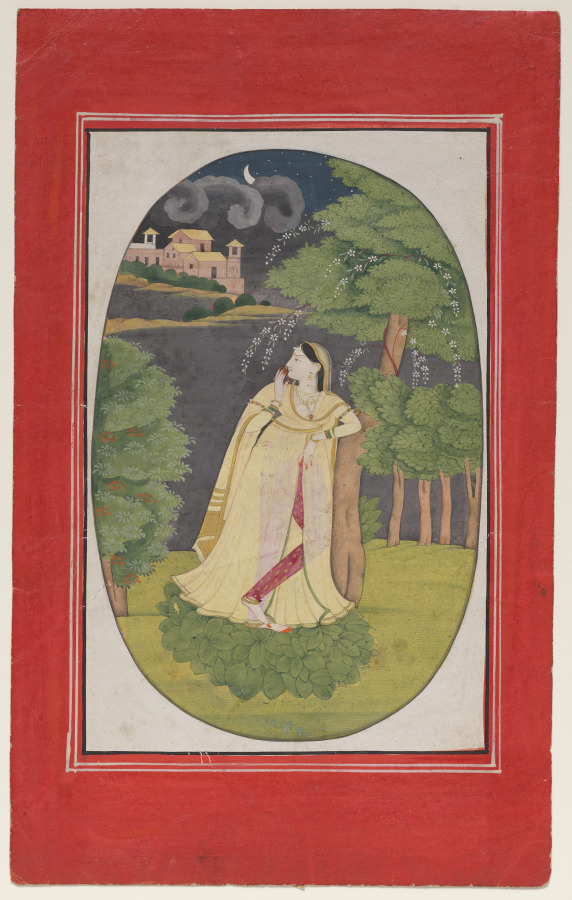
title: The heroine who waits anxiously for her absent lover (Utka Nayika)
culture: Northern India, Pahari kingdoms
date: c. 1800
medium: Gum tempera on paper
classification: Painting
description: Inspired by devotional poetry that likens the waiting for divine favor to that of a woman alone in the forest waiting for her lover, Pahari painters mastered portrayals of this subject. Darkness has fallen, but the moon and stars and jasmine flowers brighten the night. However, monsoon clouds approach in the distance, suggesting impending danger and misery. Her gesture and expression suggest a mixture of hope and heightened uncertainty about how much longer she should continue to wait.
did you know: Utka Nayika is often shown standing or resting on a bed of leaves.